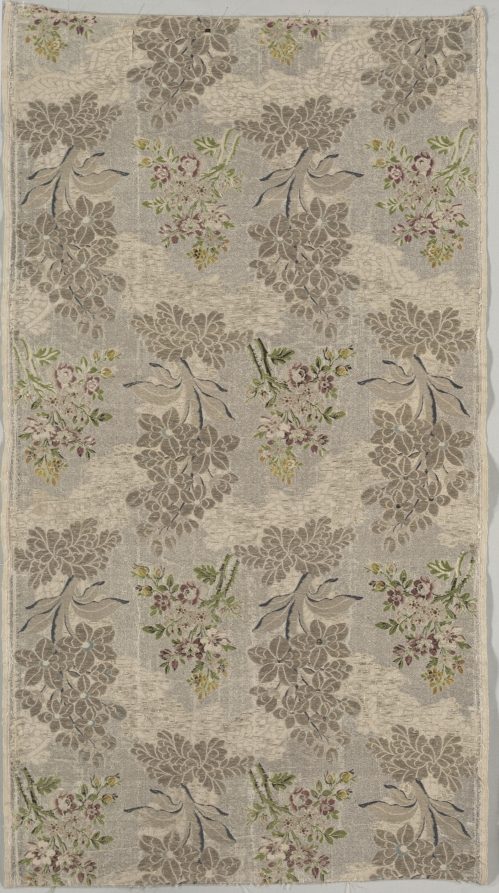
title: Length of Silk Brocade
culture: Spain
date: 1700s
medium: plain cloth weave, brocaded: silk and metal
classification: Textile